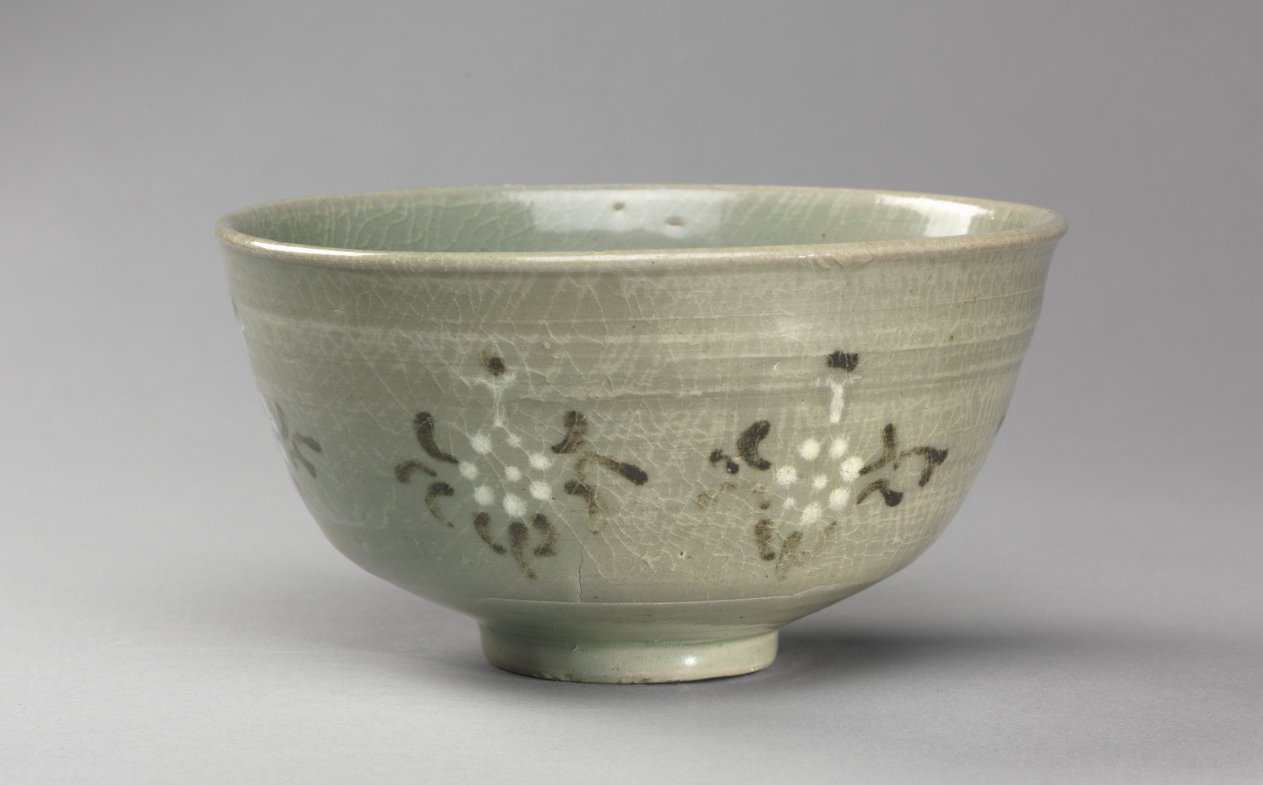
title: Cup with Chrysanthemum Design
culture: Korea, Goryeo dynasty (918–1392)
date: 1200s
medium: glazed stoneware with slip decoration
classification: Ceramic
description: As early as the seventh century, the practice of drinking tea became an important part of elite culture in Korea. In enjoying teas, elites commissioned a variety of types of utensils and vessels including this large bowl, not only to make their tea-drinking experience more exciting, but also to show their refined taste.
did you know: The inlaid technique depicting blooming chrysanthemums, as demonstrated in this tea cup, was the major decoration method utilized by Korean potters in the 1300s.